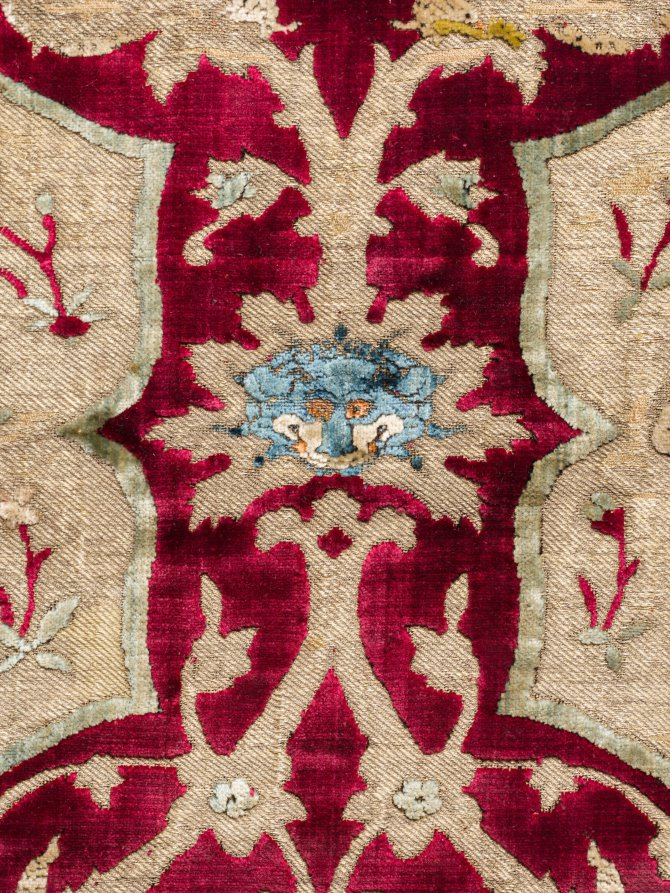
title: Fragment with falconer and attendant in animated lattice, from a robe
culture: Iran, Kashan, Safavid period (1501–1722)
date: mid-1500s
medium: Silk: velvet, brocaded, pile-warp substitution; gilt-metal thread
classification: Velvet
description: This velvet of Iran’s Safavid period (1501–1722) displaying a falconry scene is celebrated for its refined beauty and meticulous draftsmanship. A falconer and attendant flank a blossoming plant on a golden ground of lobed medallions. Animated vines display leaves bearing lion’s masks and dragons coiled around larger leaves on the crimson ground. Instead of two or three colors of velvet, Iranian weavers wove with as many as 14 colors, the most colorful velvets ever woven.